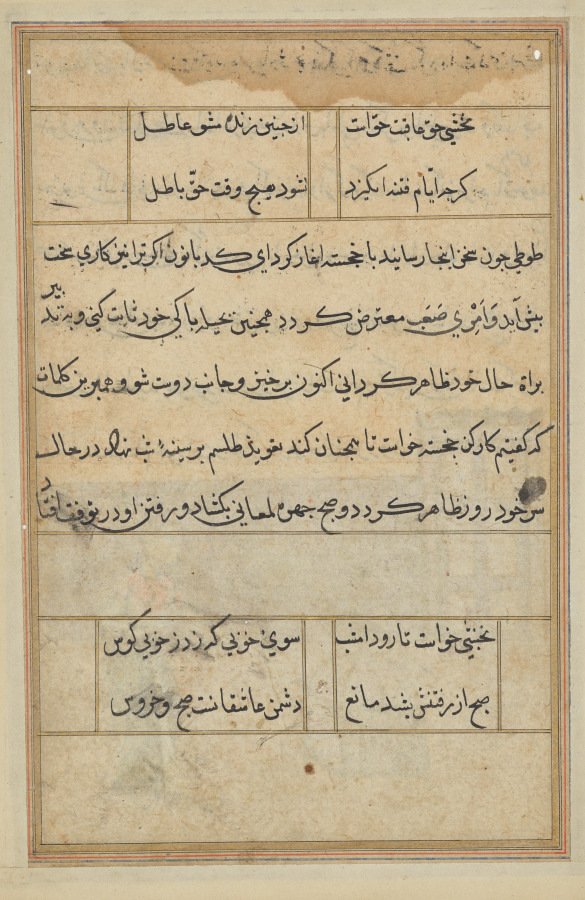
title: Page from Tales of a Parrot (Tuti-nama): text page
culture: Mughal India, court of Akbar (reigned 1556–1605)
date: c. 1560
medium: gum tempera, ink, and gold on paper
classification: Painting